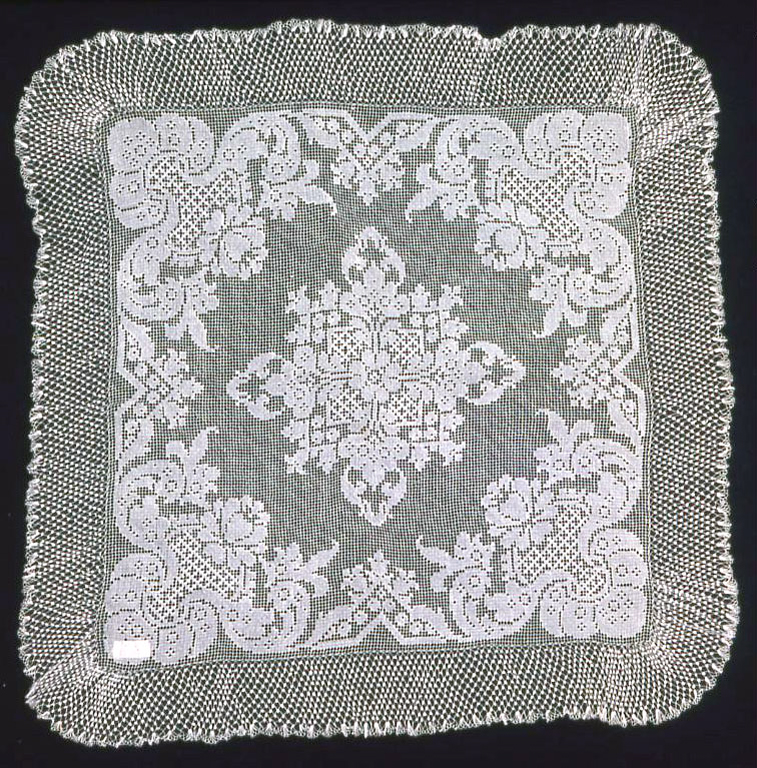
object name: Textile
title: Doily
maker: Europe or United States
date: 1850/1900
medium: Cotton, knotted square netting; embroidered in cloth stitch (lacis or filet work); edged with lopped netting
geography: Europe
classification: textile; needlework (visual works)